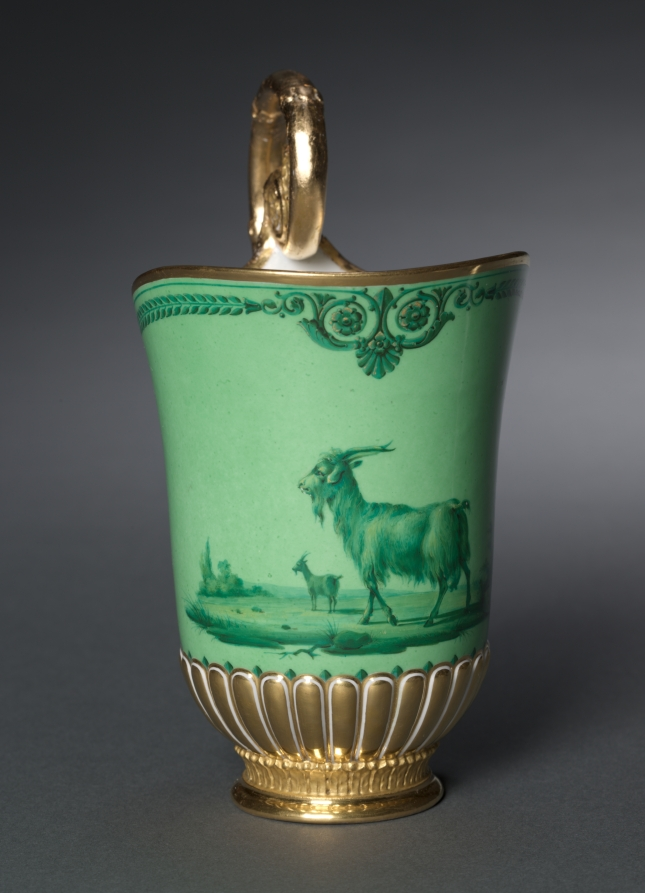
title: Cream Jug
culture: France, 18th-19th century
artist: Sèvres Porcelain Factory (French, est. 1756)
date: designed 1788, made 1831–1834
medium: gilt porcelain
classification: Ceramic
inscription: R...R(?)-34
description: The pattern for this cream jug was originally designed for Marie-Antoinette, queen of France, in 1788